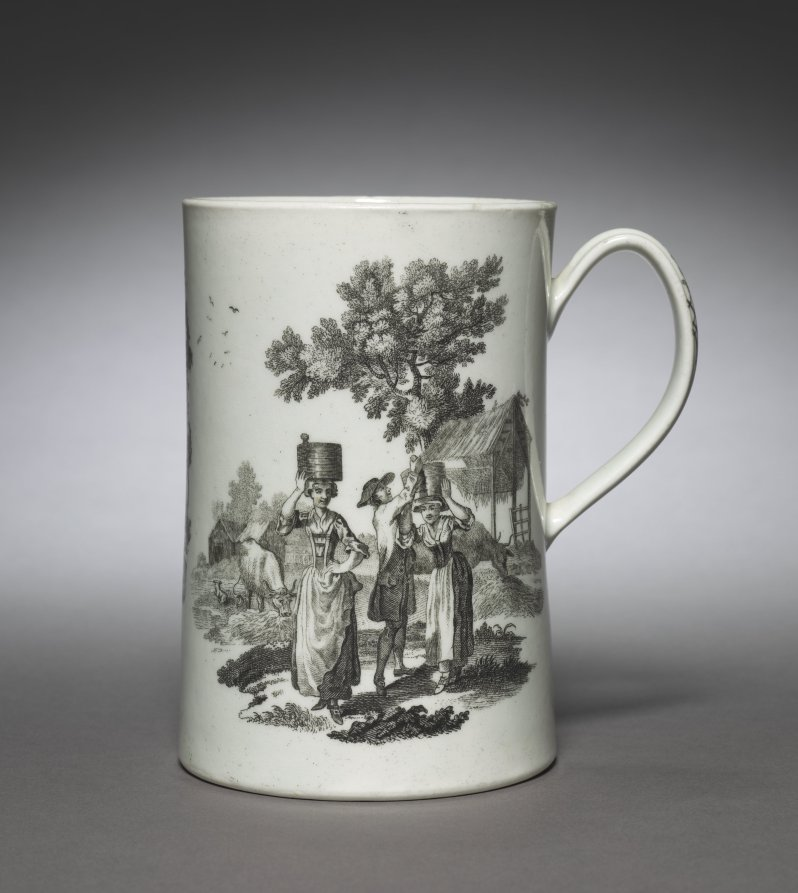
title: Cann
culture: England, 18th century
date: c. 1770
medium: ceramic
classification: Ceramic